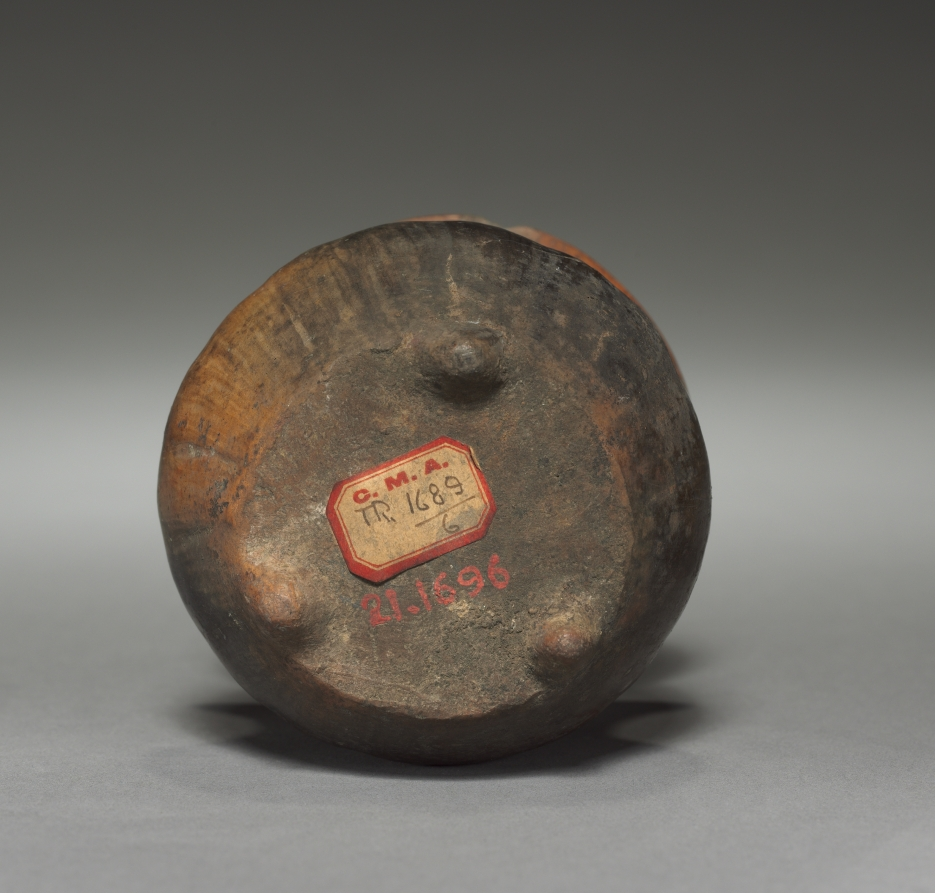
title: Vase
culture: Mexico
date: before 1521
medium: pottery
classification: Ceramic